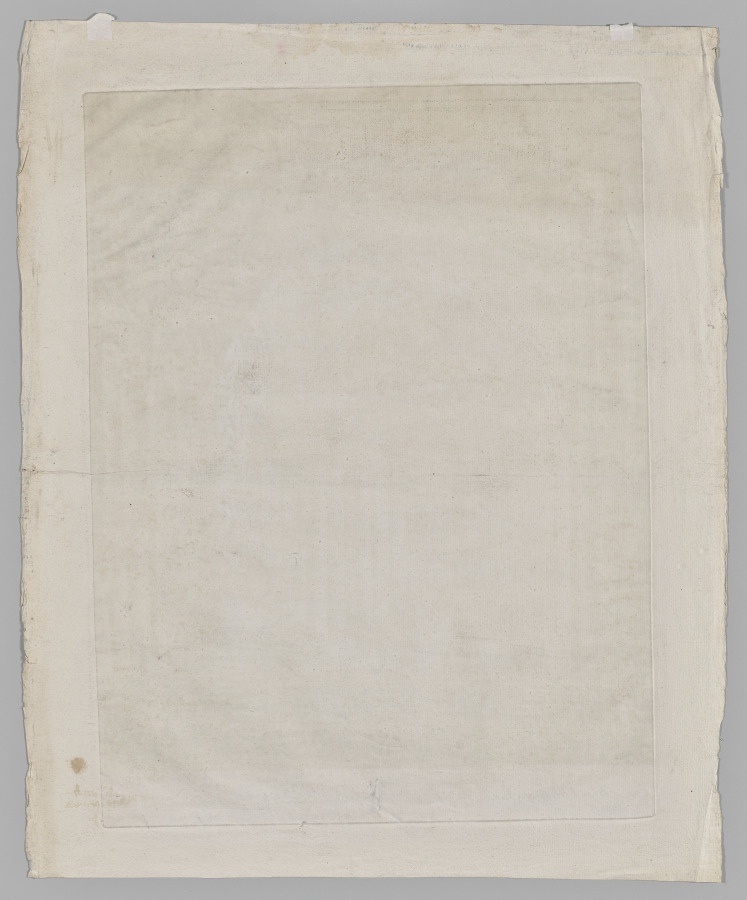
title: A View of the Stairs of the Vatican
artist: Georges Francois Blondel (French, 1730–1800)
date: 1766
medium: mezzotint printed in black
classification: Print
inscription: Imprinted on recto: “A View of the Stairs of the Vatican”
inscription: Imprinted on recto: “G.F. Blondel Del el Fecit.”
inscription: Imprinted on recto: “To his Royal Highness’ William Henry Duke of Gloucester Hc.Hc.Hc. this plate is with all Humility Dedicated by his Highness’s most humble and most ob [illegible]?/Published according to Act of Parliament by G.F. Blondel/G.F. Blondel”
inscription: Watermark: Grand-Jésus stock of T. Dupuy, watermark Name of Jesus (IHS), countermark T Dupuy Fin Auvergne 1742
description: After returning from several years spent in Italy, the French printmaker George-Francois Blondel settled in London in order to take advantage of the English taste for images of Italian sites. This is one of a series of eight prints he published in 1766 depicting imagined and real Italian interiors. Using the relatively new technique of mezzotint, which creates velvety, dark tonal areas, as well as low vantage points, Blondel created towering, awe-inspiring spaces. For special patrons, he printed the plates in sepia ink, rather than in black; the CMA’s set includes two of these unusual sepia impressions.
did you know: Mezzotint was relatively new at the time this print was made and had yet to be utilized for such large plates of an architectural nature as seen here.